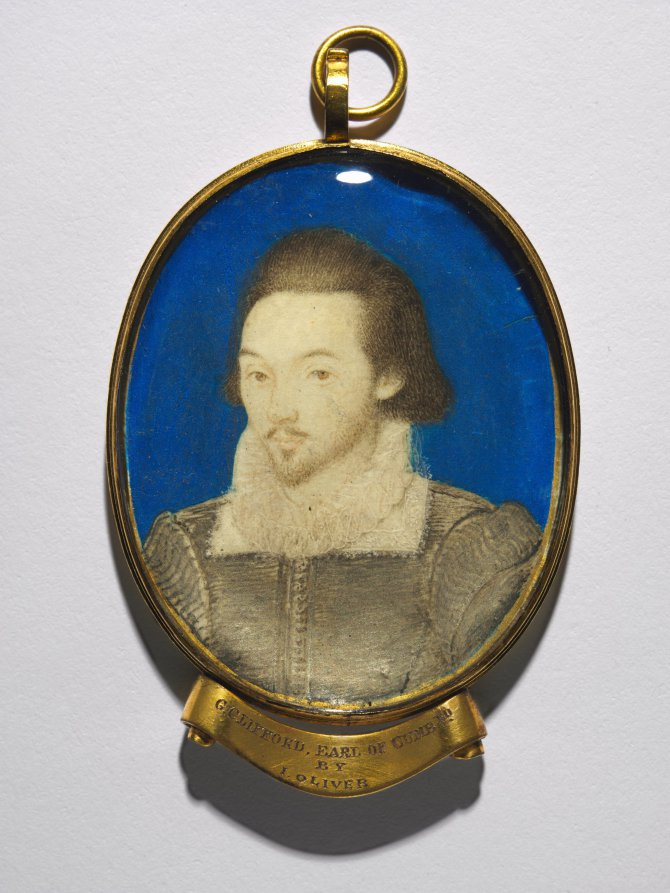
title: Portrait of a Man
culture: England, 17th century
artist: manner of Nicholas Hilliard (English, c. 1547–1619)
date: c. 1600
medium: watercolor on vellum with a gold border in a gilt metal frame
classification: Portrait Miniature